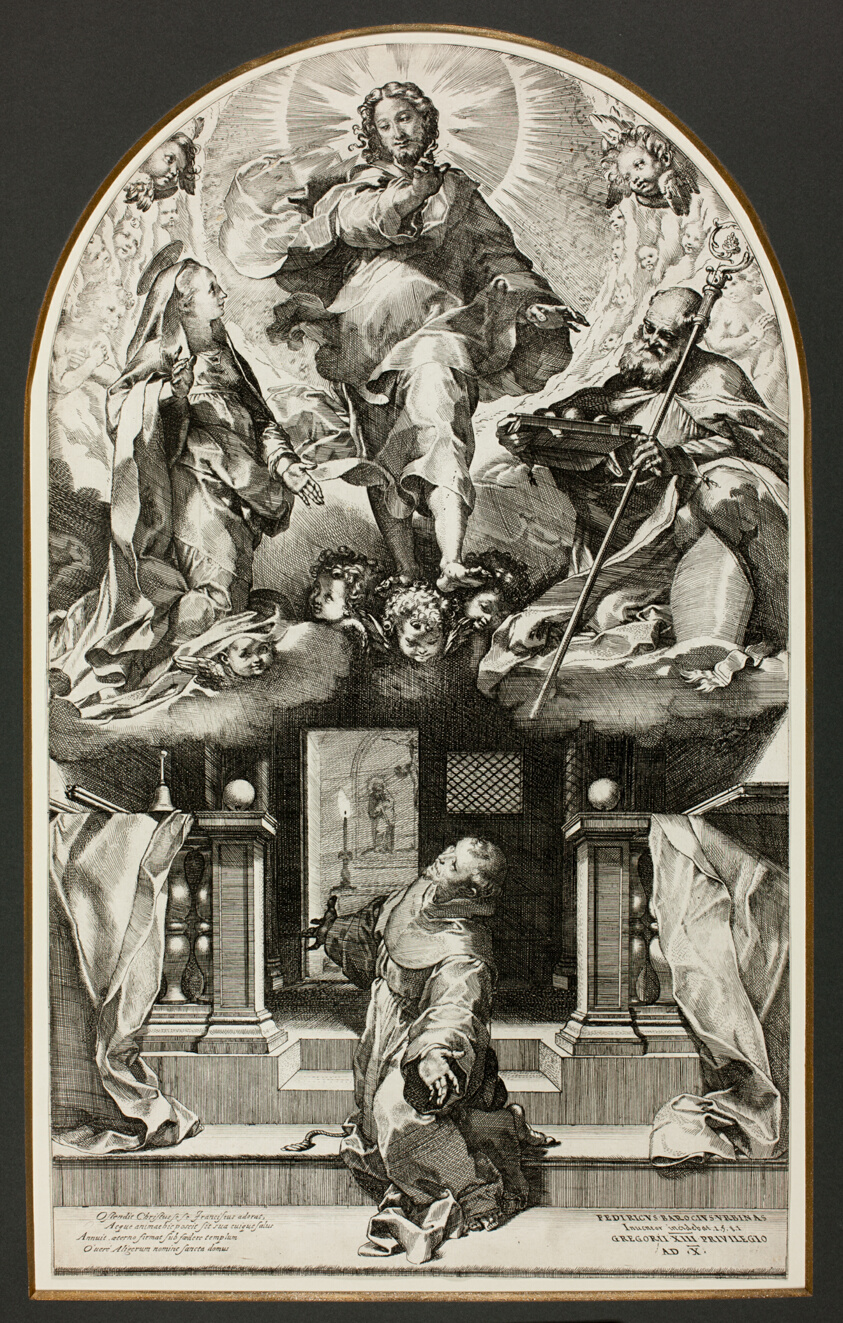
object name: Print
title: The Vision of Saint Francis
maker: Federico Barocci (Italian, c. 1535-1612)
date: 1581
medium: Etching and engraving on ivory laid paper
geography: Italy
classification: etching; print; prints and drawing